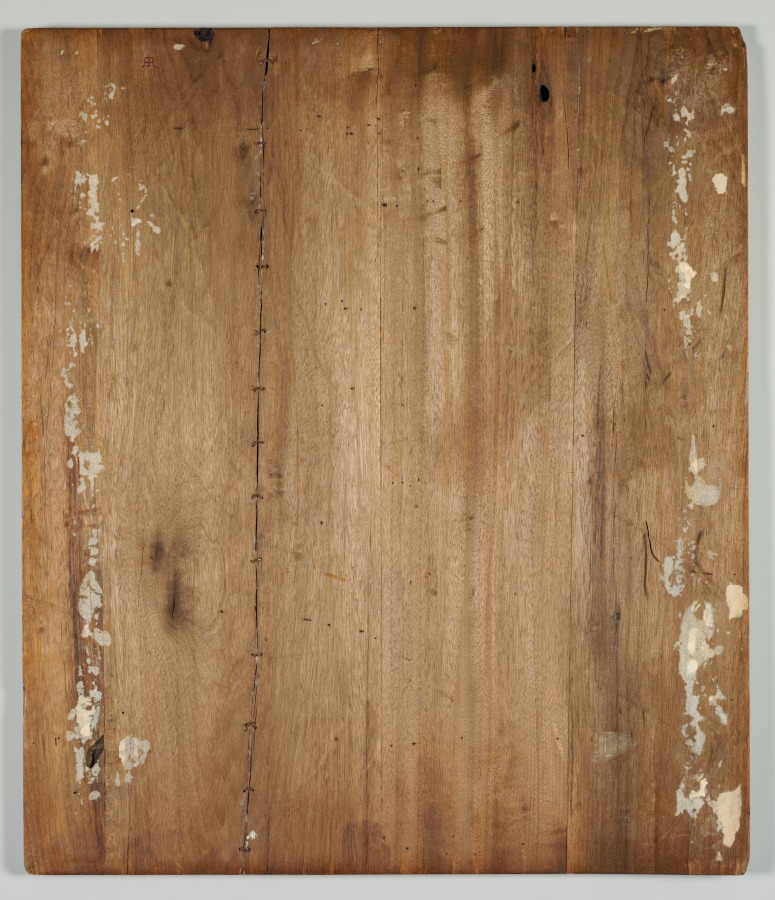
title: Battle Scenes of the Quelling of Rebellions in the Western Regions, with Imperial Poems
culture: China, Qing dynasty (1644–1911), Qianlong reign (1736–95)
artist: Giuseppe Castiglione (Italian, 1688–1766)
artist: Jean Damascene Sallusti (Italian, d. 1781)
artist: Jean Denis Attiret (French, 1702–1768)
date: c. 1765–74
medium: Etchings, mounted in album form, 16 leaves plus two additional leaves of inscriptions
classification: Print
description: This set of etchings was commissioned by Emperor Qianlong to record in pictorial terms the courage of his generals and soldiers in quelling the rebellions in the Western Regions. Qianlong added his own poem to each of the etchings, indicating his appreciation and pride in this demonstration of military might. "Western Regions" refers to the present-day Xingjiang province, often described in Western writing as "Central Asia."